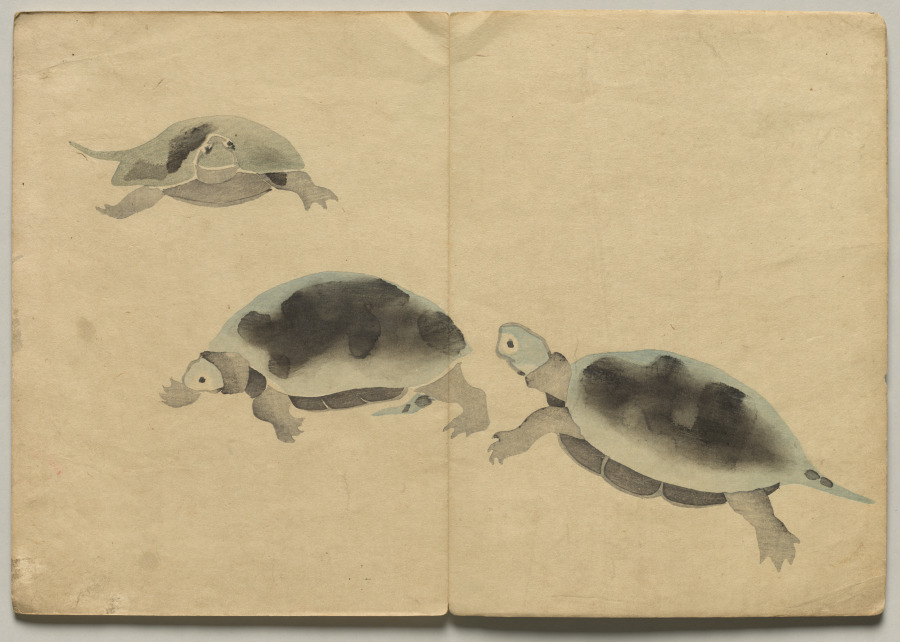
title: Scene from The Kōrin Picture Book (Volume 2)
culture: Japan, Edo period (1615–1868)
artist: Nakamura Hōchū (Japanese, d. 1819)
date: 1800s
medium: color woodblock printed book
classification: Bound Volume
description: Ogata Korin (1658-1716) was one of the most admired artists of Rimpa, or "decorative school painting." These books by the charming later-generation Rimpa artist Hochu record Korin's inventive designs.